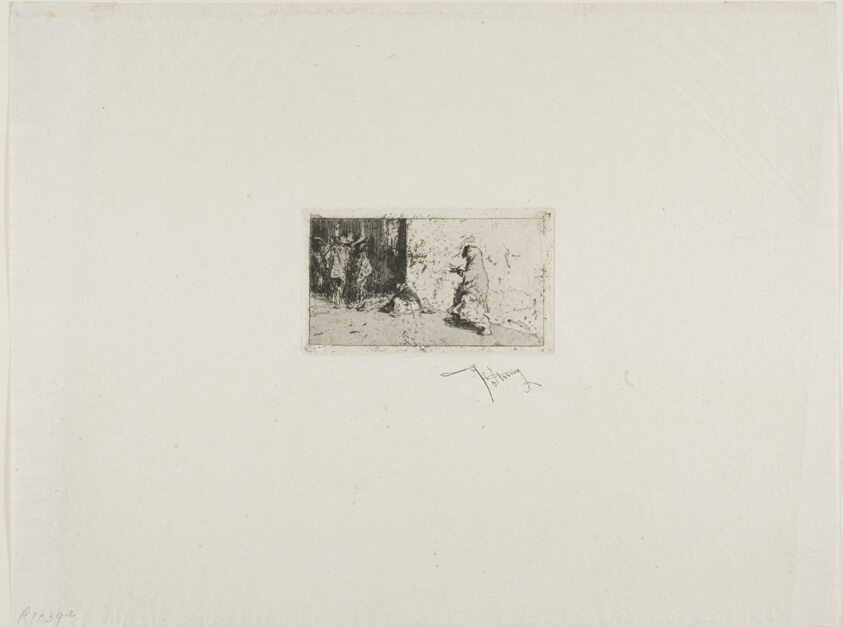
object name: Print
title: A Street in Seville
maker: Mariano José María Bernardo Fortuny y Carbó; Spanish, 1838-1874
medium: Etching on paper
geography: Spain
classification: etching; print; prints and drawing